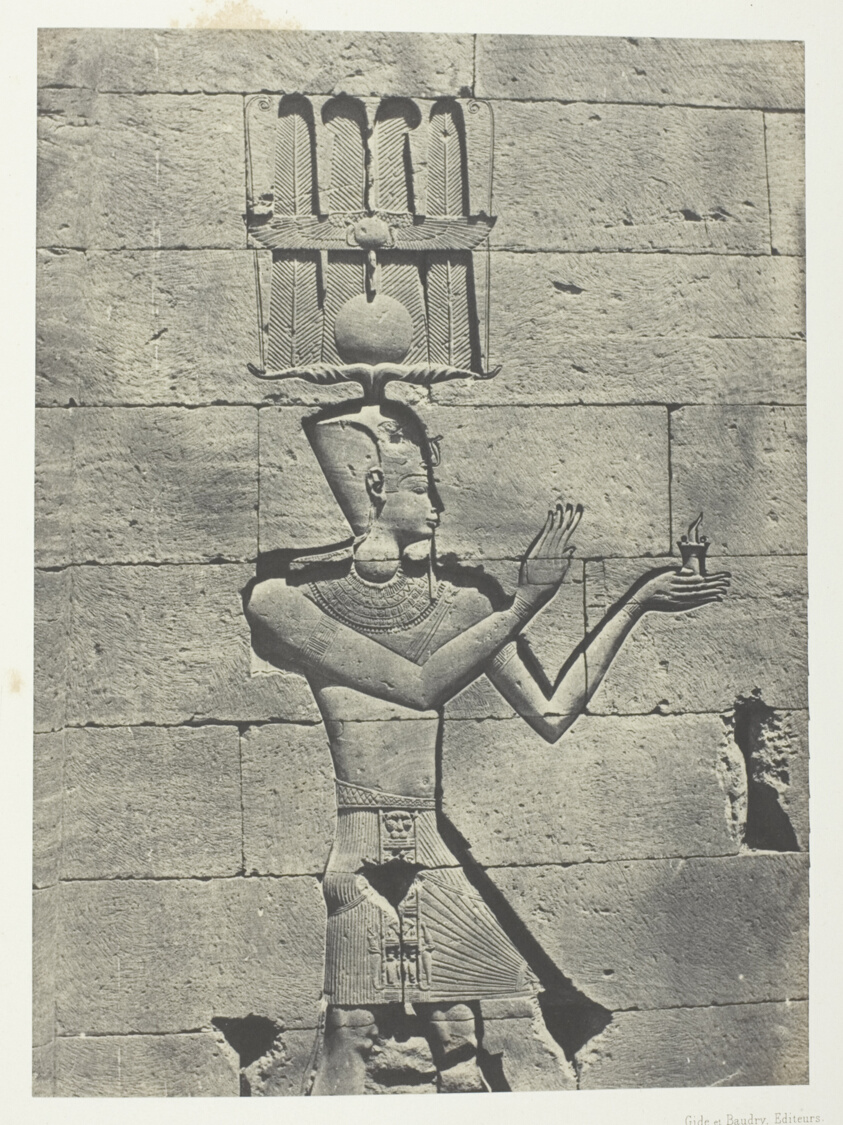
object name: Photograph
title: Kalabscheh, Sculptures De La Façade Postérieure Du Temple; Nubie, plate 91 from the album "Egypte, Nubie, Palestine et Syrie" (1852)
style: 19th century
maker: Maxime Du Camp (French, 1822–1894)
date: 1849/51, printed 1852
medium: Salted paper print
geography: France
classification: salted paper print; photographic process; photography; photograph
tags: Collected by Hugh Edwards, Egypte, Nubie, Palestine et Syrie